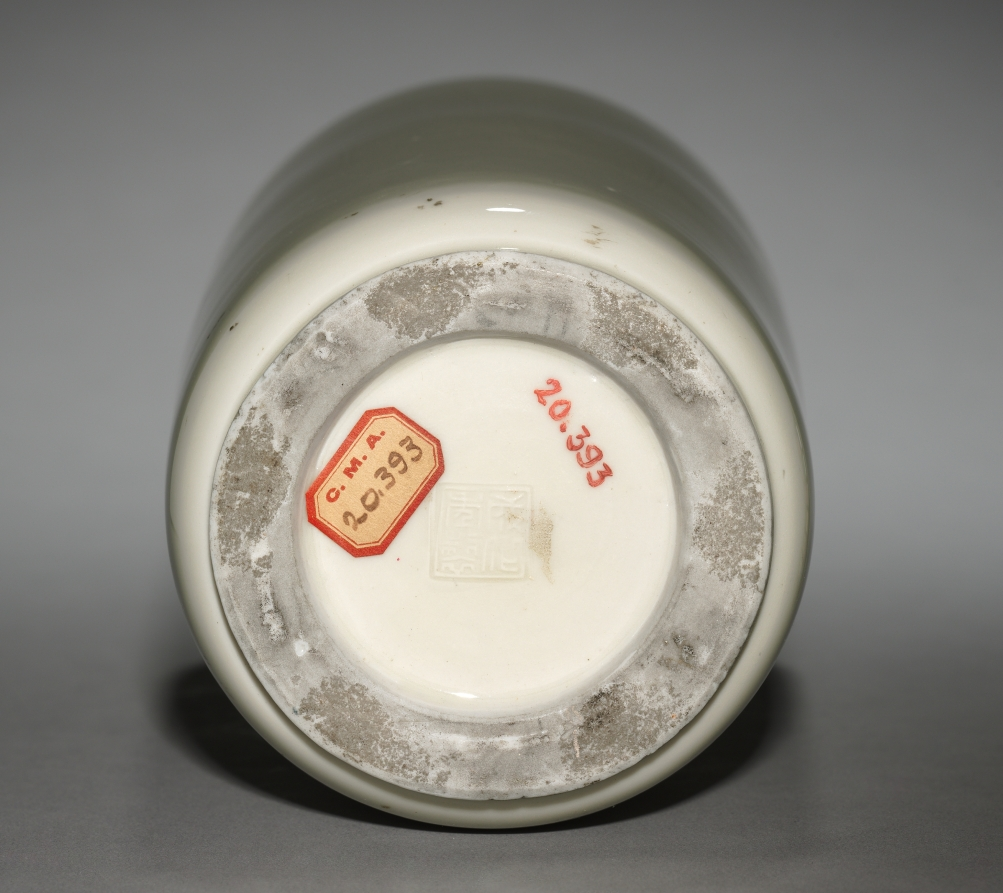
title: Vase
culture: China, Qing dynasty (1644-1911)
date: 1644–1911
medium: porcelain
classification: Ceramic